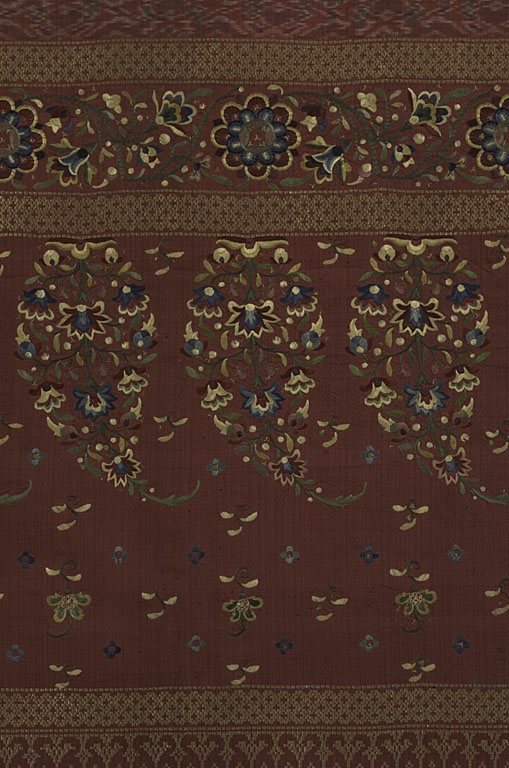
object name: Textile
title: Woman's Selendang Limar (Shoulder Cloth)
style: 19th century, indonesian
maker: Palembang area, south Sumatra, Indonesia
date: Late 19th century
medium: Silk and gold-leaf-over-lacquered-paper-strip-wrapped silk, weft resist dyed (weft ikat), plain weave with supplementary patterning wefts; embroidered with silk in satin, single satin, and stem stitches; embellished with gold spangles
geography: Indonesia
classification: textile; needlework (visual works); costume accessory; garment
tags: paisley, floral